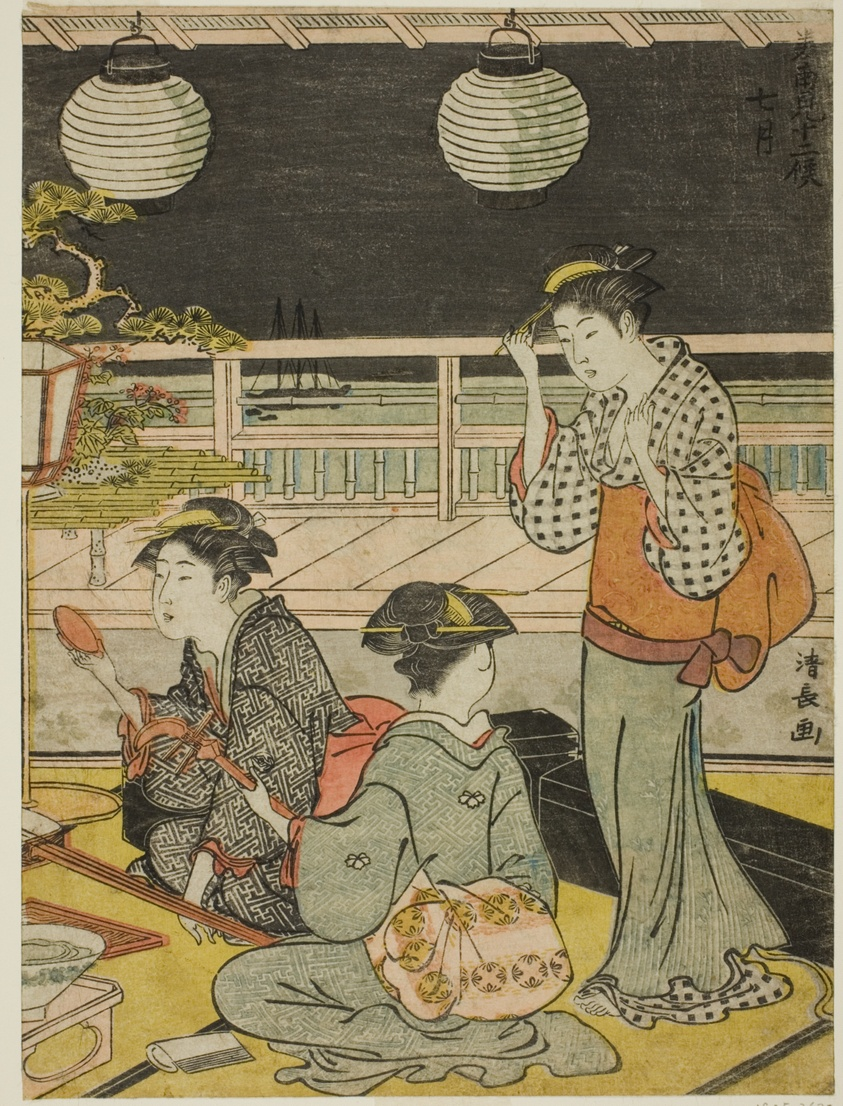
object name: Print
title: The Seventh Month (Shichigatsu), from the series "Twelve Months in the South (Minami juni ko)"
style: Japanese (culture or style)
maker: Torii Kiyonaga (Japanese, 1752-1815)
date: c. 1783/84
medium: Color woodblock print; chuban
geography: Japan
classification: woodblock print; print; asian art